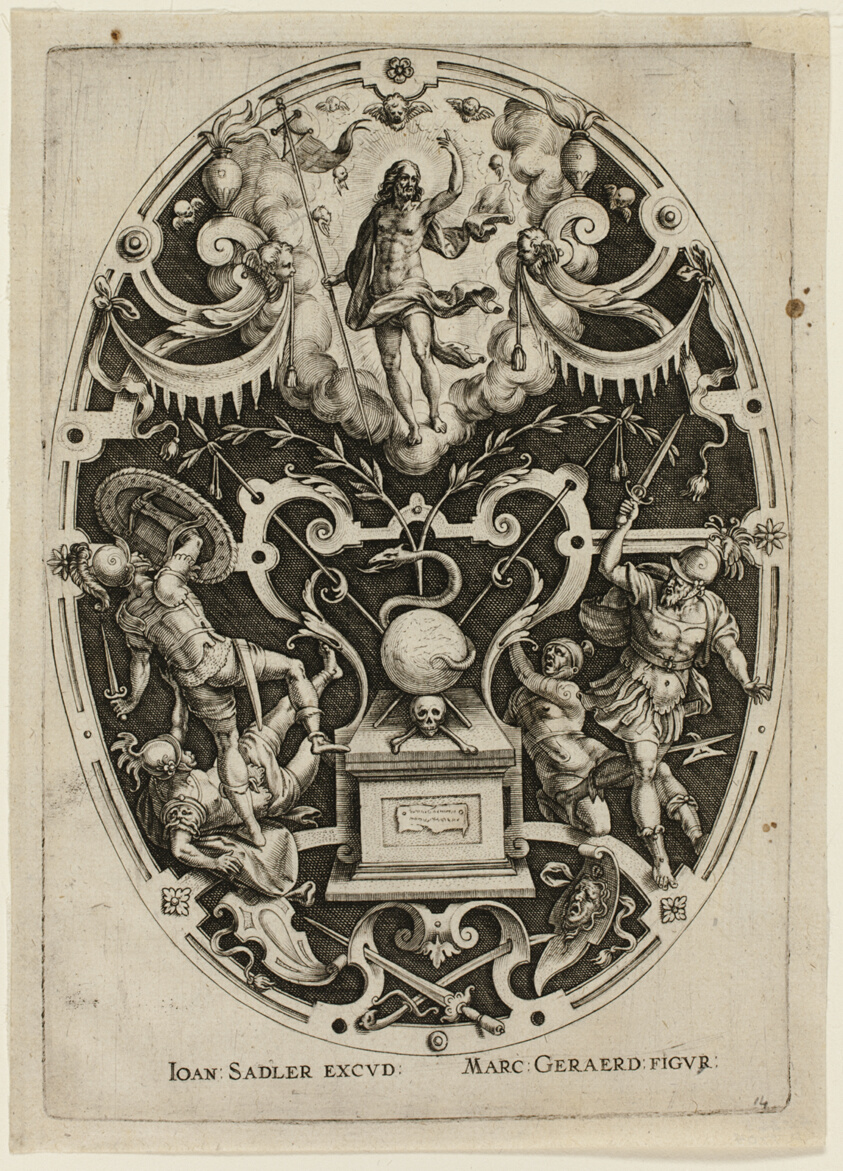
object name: Print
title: Resurrection, from Passion of Christ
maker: Jan Sadeler, the Elder (Flemish, 1550-1600); after Marcus Gheeraerts, the Elder (Flemish, c. 1520-c. 1590)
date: 1575/1600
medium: Engraving in black on ivory laid paper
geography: Flanders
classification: engraving; print; prints and drawing